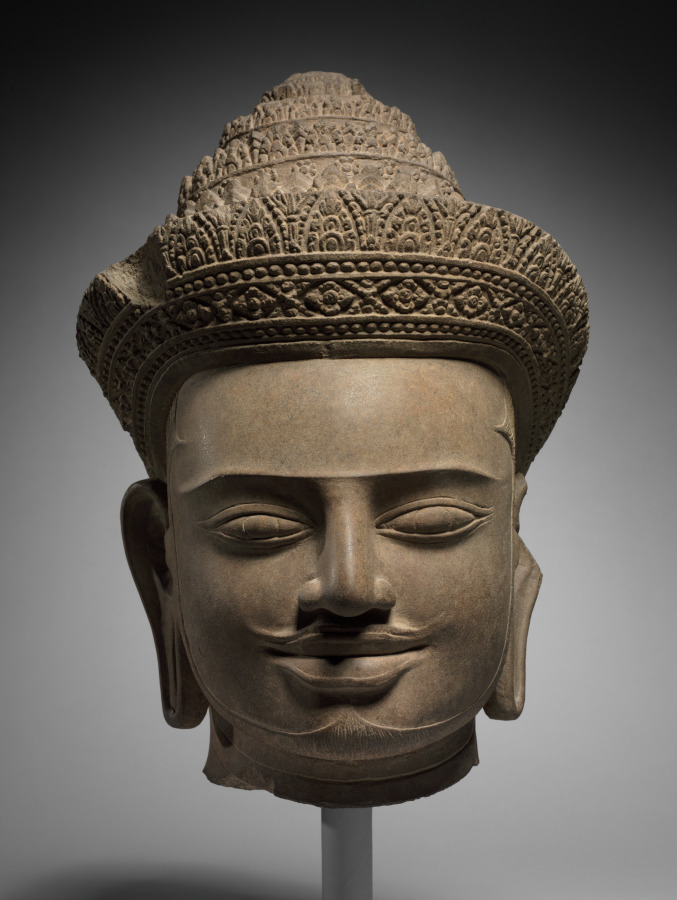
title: Head of a Deity or a Deified King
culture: Cambodia, Koh Ker, Reign of Jayavarman IV, 928-941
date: mid-900s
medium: sandstone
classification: Sculpture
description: The diadem is depicted tied to the intricate tiered headdress worn only by a god or king. Without further attributes, the identity cannot be known. Khmer sculptors of the 10th century emphasized powerful forms and extroverted expressions. The incised pupils suggest that this sculpture underwent the ritual of awakening, in which the eyes were added last. The royal head on the left is from a temple dedicated to Shiva, which was established by the Khmer king Jayavarman IV (928–942) in his remote capital of Koh Ker, 100 miles north of Angkor.